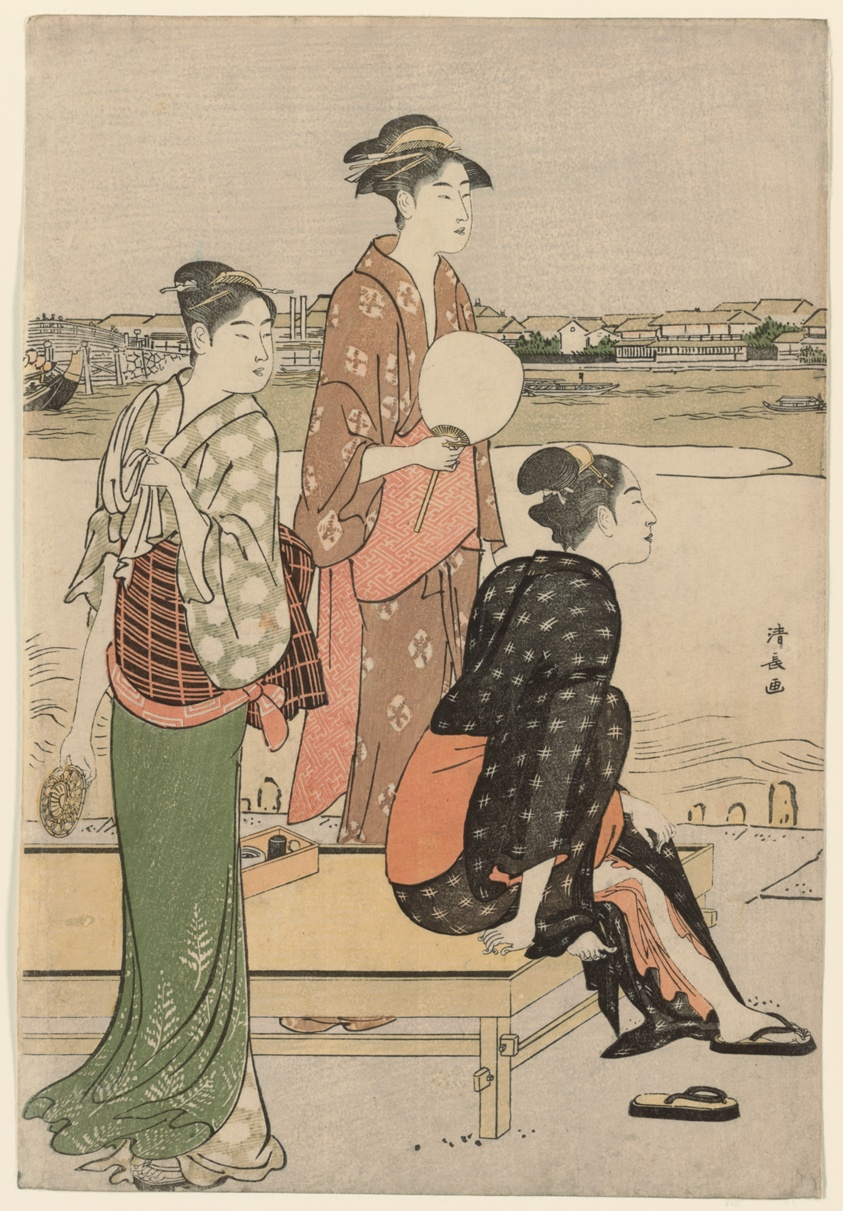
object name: Print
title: Summer Twilight on the Banks of the Sumida River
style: Japanese (culture or style)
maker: Torii Kiyonaga (Japanese, 1752-1815)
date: c. 1784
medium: Color woodblock print; right sheet of oban diptych (left sheet: 1925.2656)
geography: Japan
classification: woodblock print; print; asian art